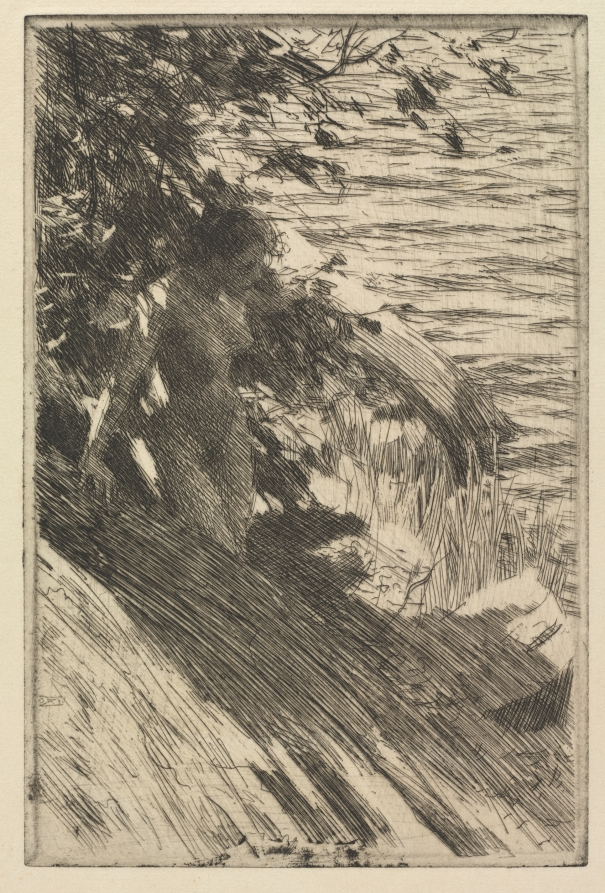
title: The Great Bather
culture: Sweden, late 19th Century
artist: Anders Zorn (Swedish, 1860–1920)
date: 1895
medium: etching and drypoint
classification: Print